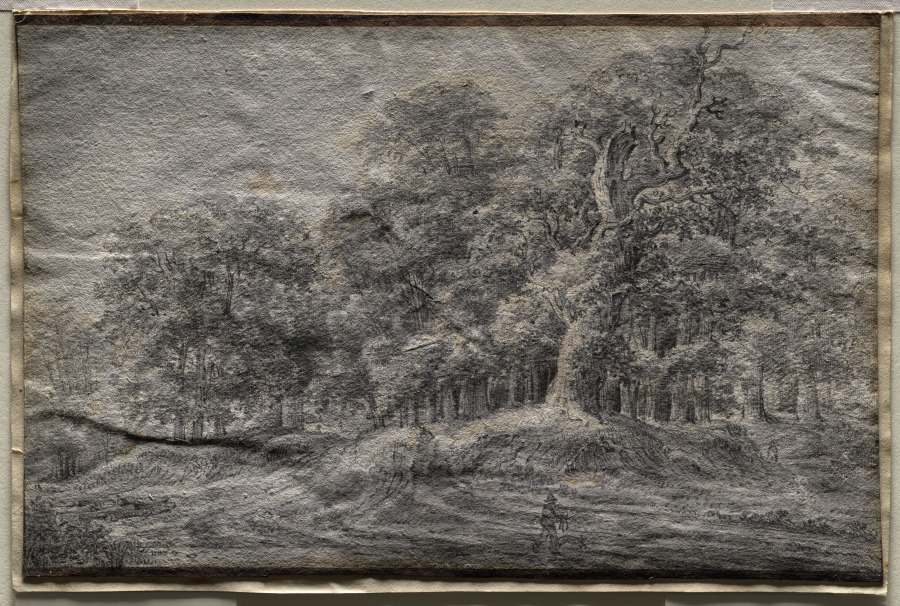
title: A Track on the Edge of a Wood with a Peasant Carrying Sheep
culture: Netherlands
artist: Anthonie Waterloo (Dutch, 1609/10–1690)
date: after 1640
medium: Charcoal and wetted charcoal and gray wash on cream laid paper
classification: Drawing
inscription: Written in pencil on verso of mount: "[illegible/illegible]"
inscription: Written in pencil on verso of mount: ""//"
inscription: Written in pencil on verso of mount: "258 x 397"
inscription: Written in pencil on verso of mount: "Reg. Christie's/sale 8.XII.76 lot 55/[illegible]=935 [illegible/illegible] Anthonie Waterloo/ex coll Dowager Lady Riser (?)/Louisa Ri [illegible] 1812 Joseph [illegible] of [illegible]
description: Known exclusively for his drawings and prints, the Dutch artist Anthonie Waterloo specialized in tree studies and dense forest scenes such as this drawing. The vista here was probably made when he visited the Veluwe region of the Netherlands, in the southern province of Gelderland along the Rhine, in the 1640s. The landscape there was known for its woodlands, heathland, panoramic views, and sand drift, producing vistas drastically different than those of the flat, northwestern Netherlandish provinces. Waterloo's technique of using wet charcoal over dry chalk produced the effect of shimmering light and movement across the complex group of trees that are the feature of the drawing. Waterloo made and sold his drawings as finished works of art.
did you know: This drawing likely depicts the sandy, wooded region of Veluwe in the southern part of the Netherlands.